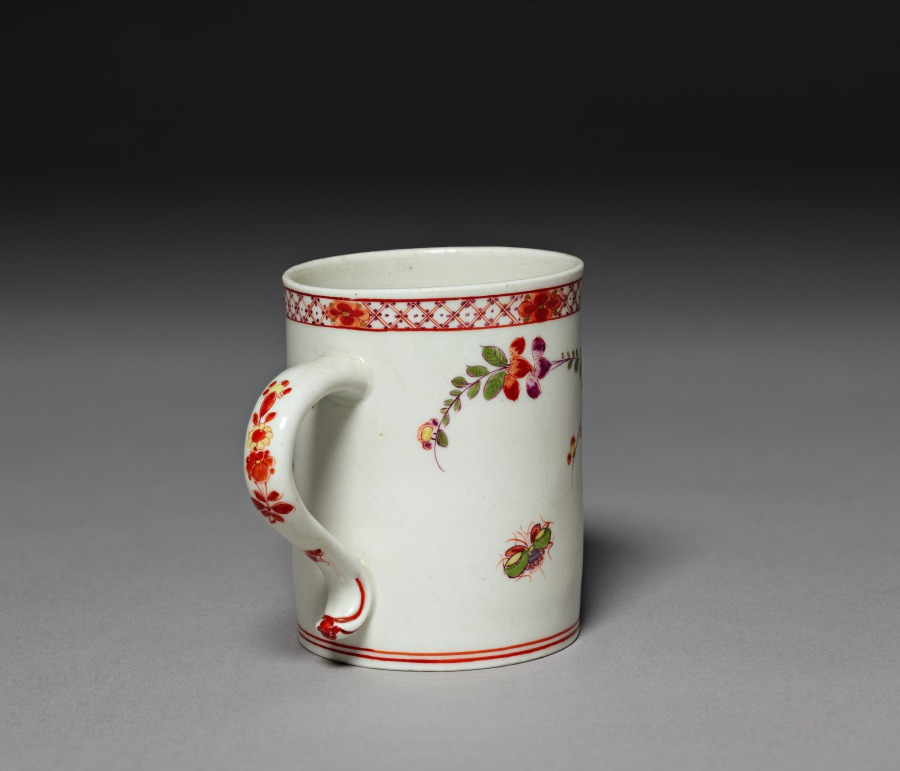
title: Small Mug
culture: Germany, Meissen, 18th century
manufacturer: Meissen Porcelain Factory (German, est. c. 1710)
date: c. 1730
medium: porcelain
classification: Ceramic